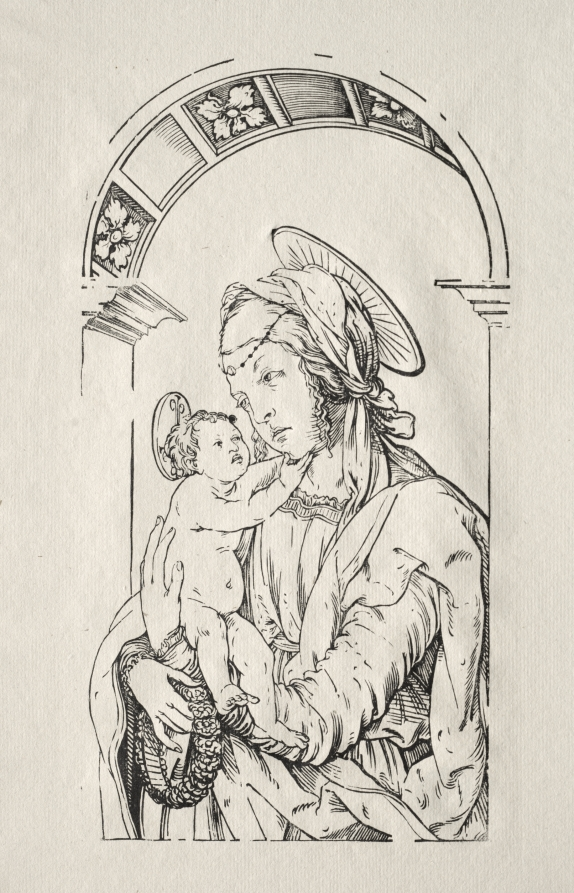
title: The Virgin with the Child under an arch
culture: Germany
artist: Hans Burgkmair (German, 1473–1531)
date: 1508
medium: woodcut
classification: Print